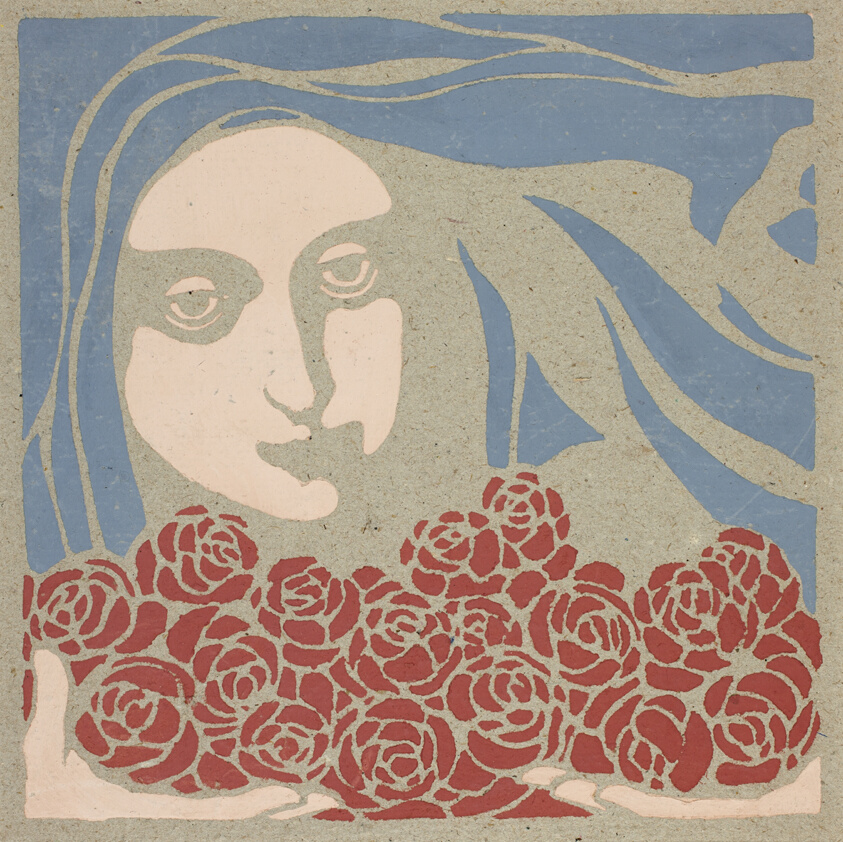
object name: Print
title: Woman's Head with Roses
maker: Koloman (Kolo) Moser (Austrian, 1868-1918)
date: 1899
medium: Color pochoir on paper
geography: Austria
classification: stencil; print; prints and drawing